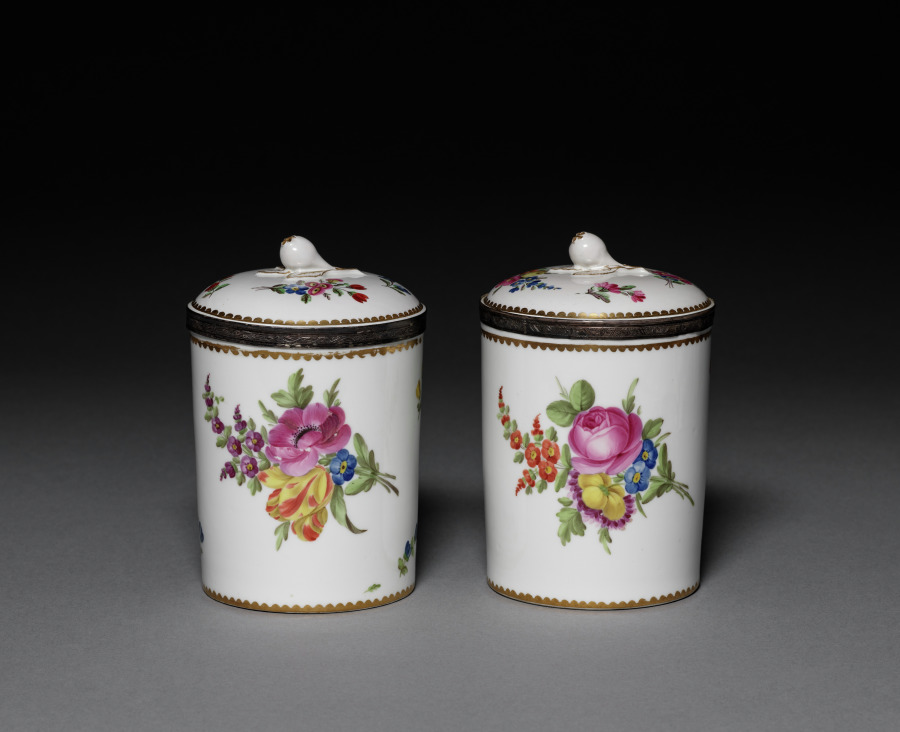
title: Pair of Covered Jars (Pots de tabac)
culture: France, 18th century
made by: Faubourg Saint-Denis (French)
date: c. 1779–1789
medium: Hard-paste porcelain with enamel and gilt decoration; metal mount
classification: Ceramic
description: Due to the discovery of the ingredient kaolin in Saint-Yrieix, France in 1768-69, European porcelain factories were able to replicate the prized hard-paste porcelain of China and Japan. In the years following, many porcelain factories opened in the area, including Faubourg Saint-Denis in 1772. These jars, sold alone or in sets, would have stored snuff, powdered tobacco meant to be inhaled, or loose tobacco for smoking.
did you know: Processes outlined in Simon Barbe’s 1693 Le Parfumeur Français (The French Perfumer) describe various ways to prepare snuff including the addition of scents, coloration of the powder, and several different grinding methods.